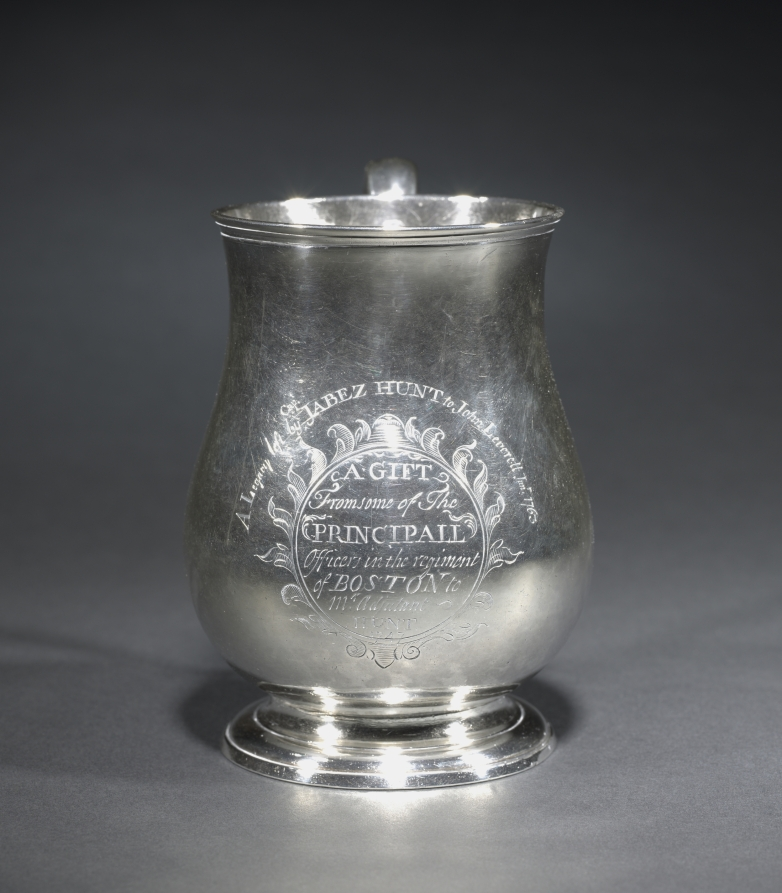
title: Cann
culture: America, Massachusetts, Boston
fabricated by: Jacob Hurd (American, 1702–1758)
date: 1747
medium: silver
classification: Silver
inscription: engraved within reserve on front, opposite handle: "A GIFT/From some of The/PRINCIPALL/ Officers in the regiment/of BOSTON to/Mr Adjutant/HUNT/1747." Above the reserve: "A Legacy left by Capt JABEZ HUNT to John Leverett Junr 1763."